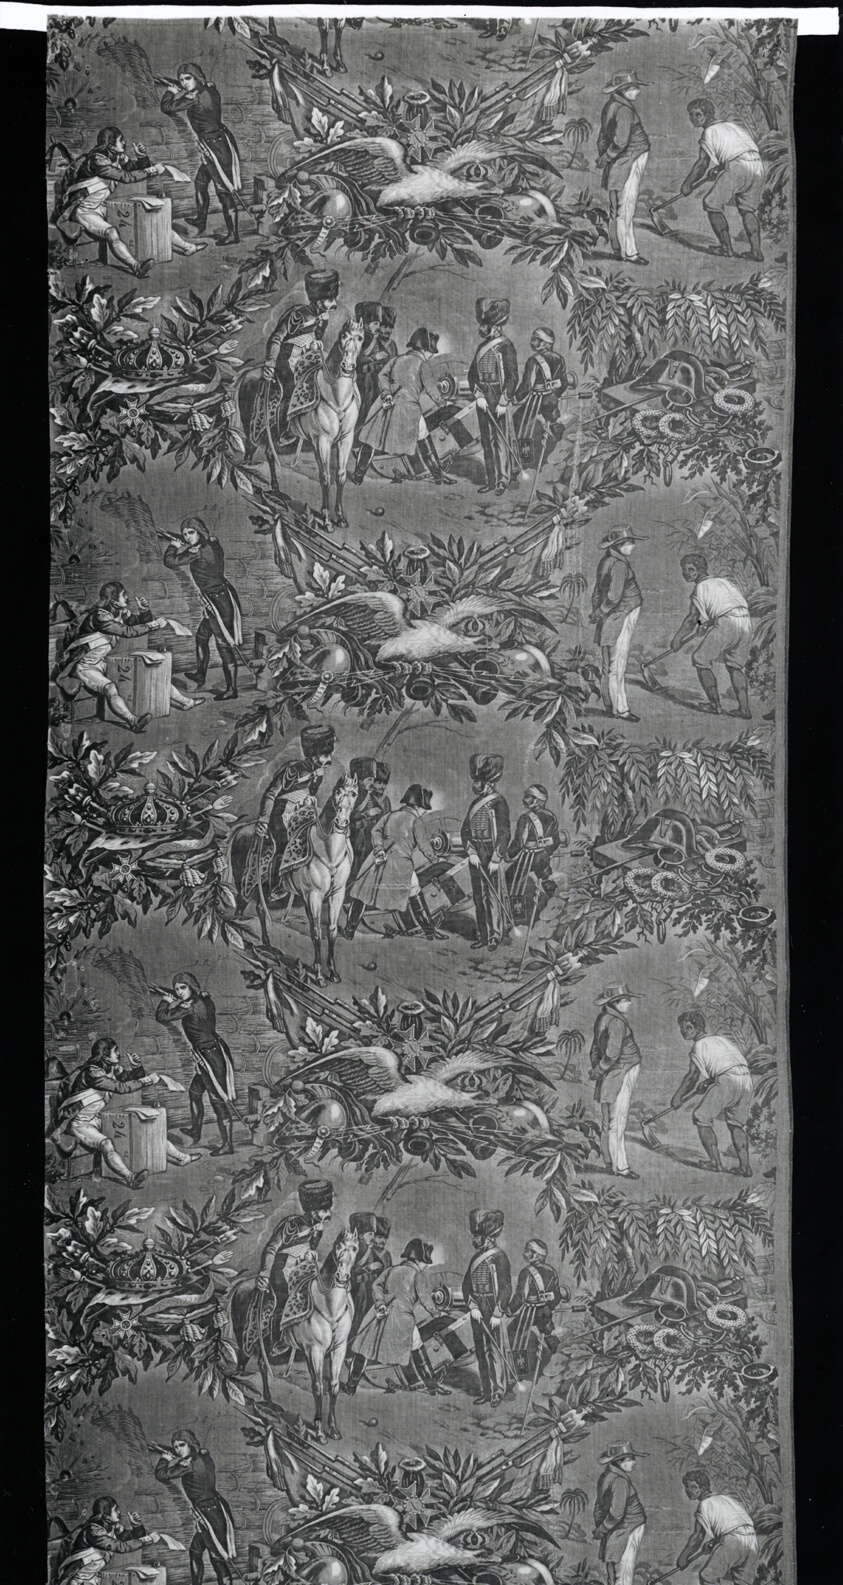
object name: Textile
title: Episodes de la Vie de Napoléon Ier (Episodes from the life of Napoleon the first) (Furnishing Fabric)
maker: Designed by George Zipelius (French, 1808–1890) after Eugene-Louis Lami (French, 1800–1890), Horace Vernet (French, 1789–1863), and Jean-Pierre-Marie Jazet (French, 1788–1871); Manufactured by Koechlin-Ziegler; France, Alsace, Mulhouse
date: c. 1840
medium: Cotton, plain weave; engraved roller printed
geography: Mulhouse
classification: textile; weaving - printed; furnishing textile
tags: propaganda